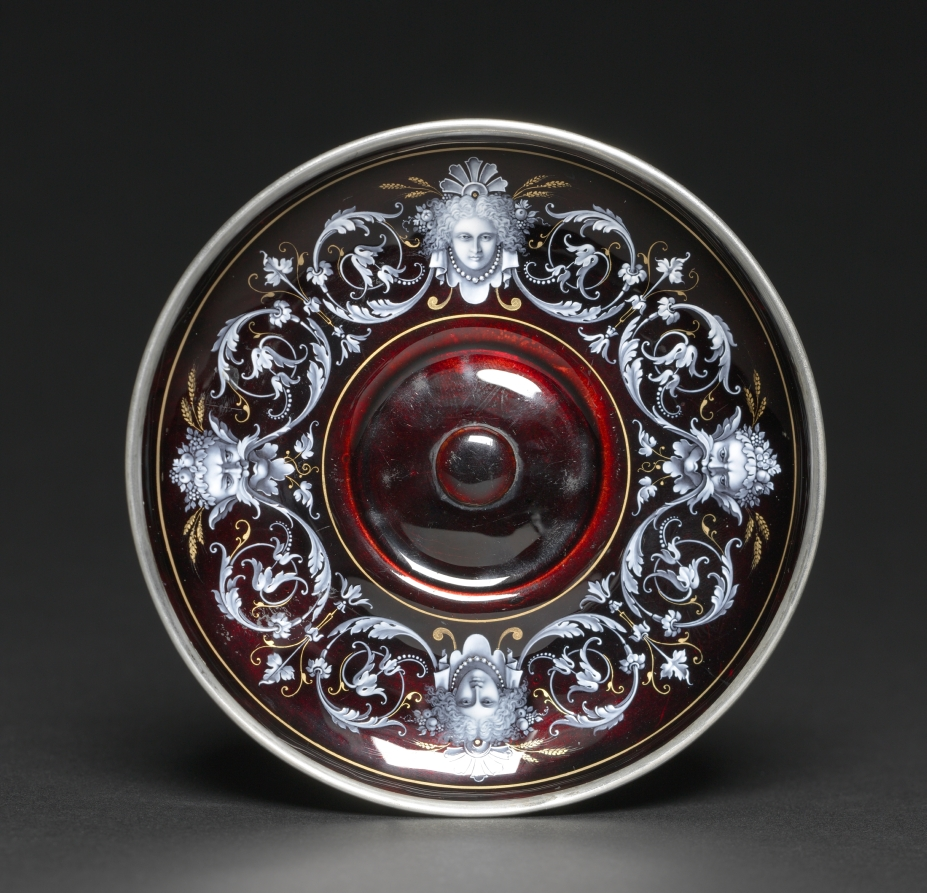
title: Saucer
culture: France, 19th century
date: c.1880–1900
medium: silver, enamel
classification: Enamel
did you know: This cup and saucer were made during the Belle Epoque or "Beautiful Era" in France.